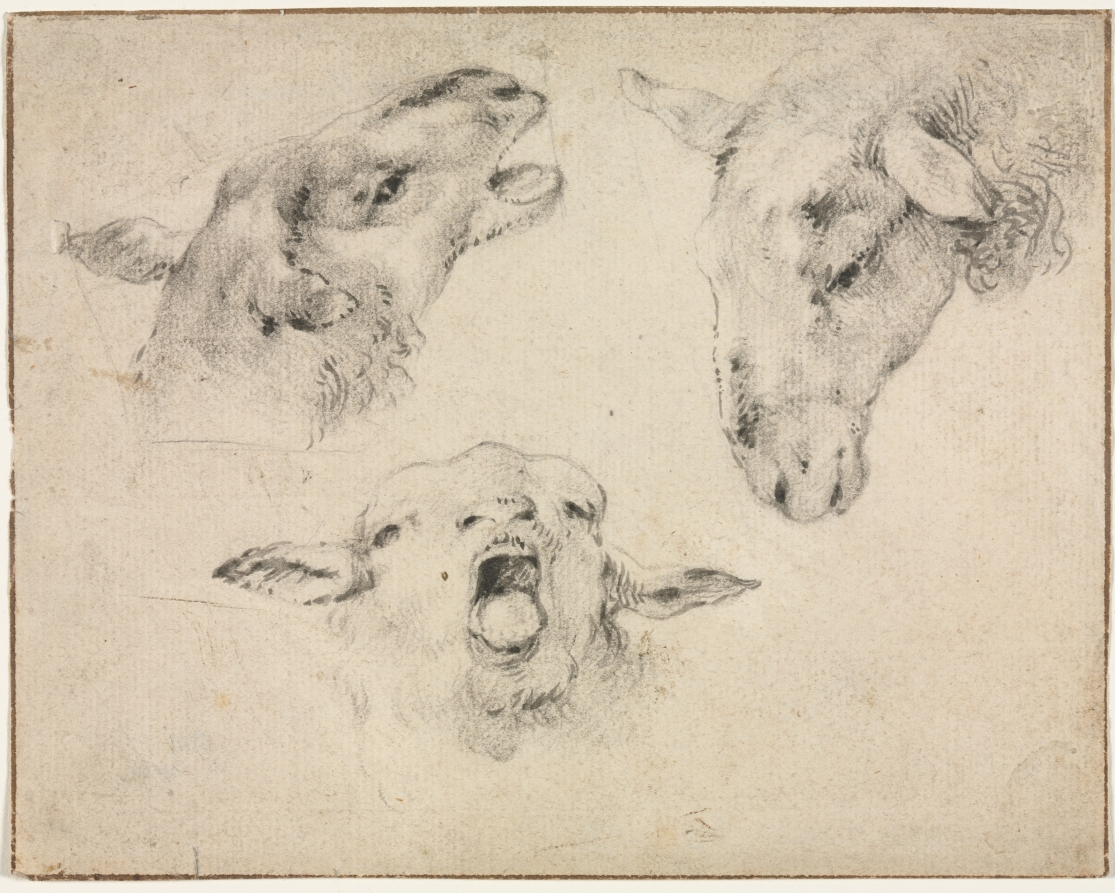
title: Sheep Heads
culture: Netherlands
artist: Wouter Verschuur (Dutch, 1812–1874)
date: second or third quarter 1800s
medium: black chalk and brush and gray and black wash over traces of graphite; framing lines in brown ink and graphite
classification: Drawing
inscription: VERSO, upper left, in graphite: W. Verschuur / 1812-1874 ; upper right, in graphite: W. Verschuur [underlined] ; lower left, in graphite: WOUTER VERSCHUUR 1812 =1874. / 19th century DUTCH SCHOOL